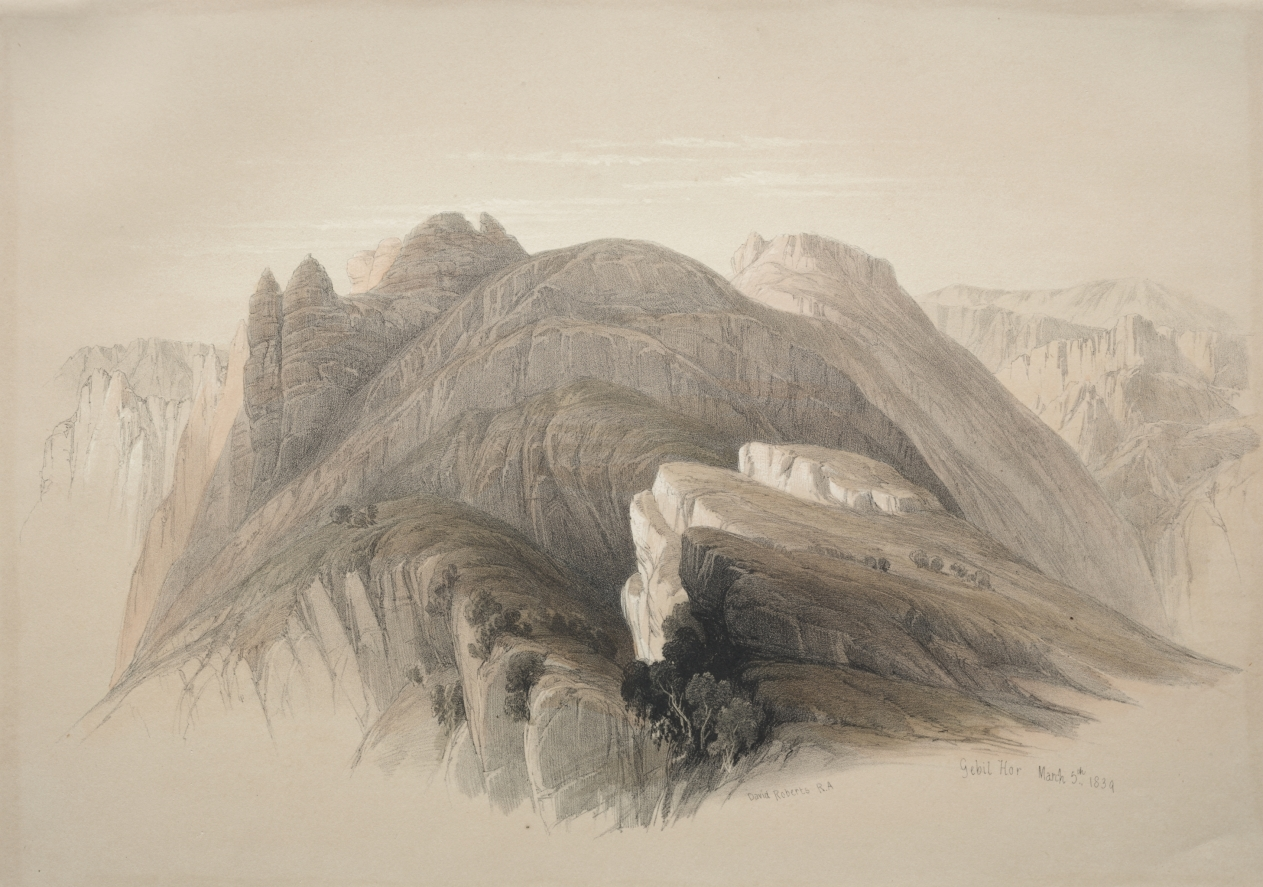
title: Gebil Hor. Mount Hor, from the Cliffs Encircling Petra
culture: England, 19th century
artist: David Roberts (Scottish, 1796–1864)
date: 1839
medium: color lithograph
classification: Print